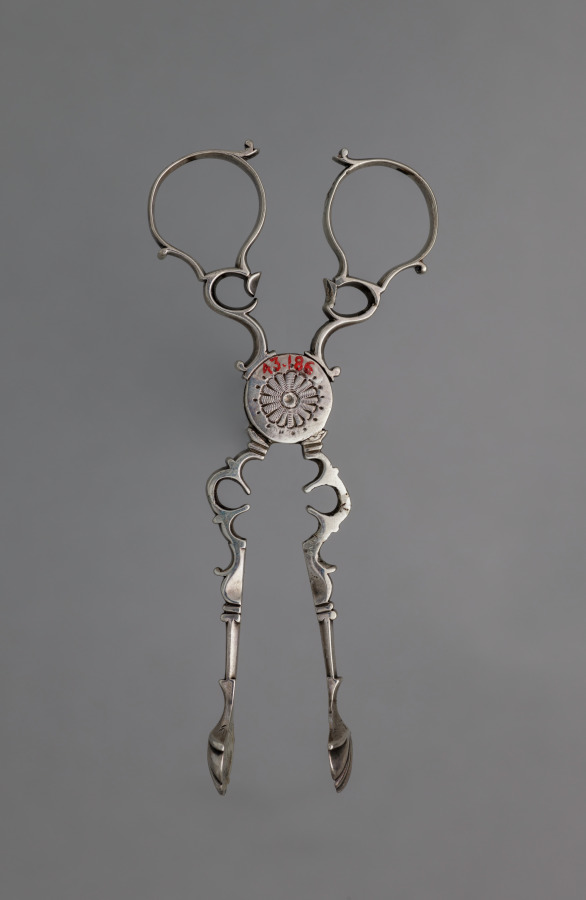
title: Sugar Tongs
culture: England, London, 18th century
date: c. 1750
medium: silver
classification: Silver